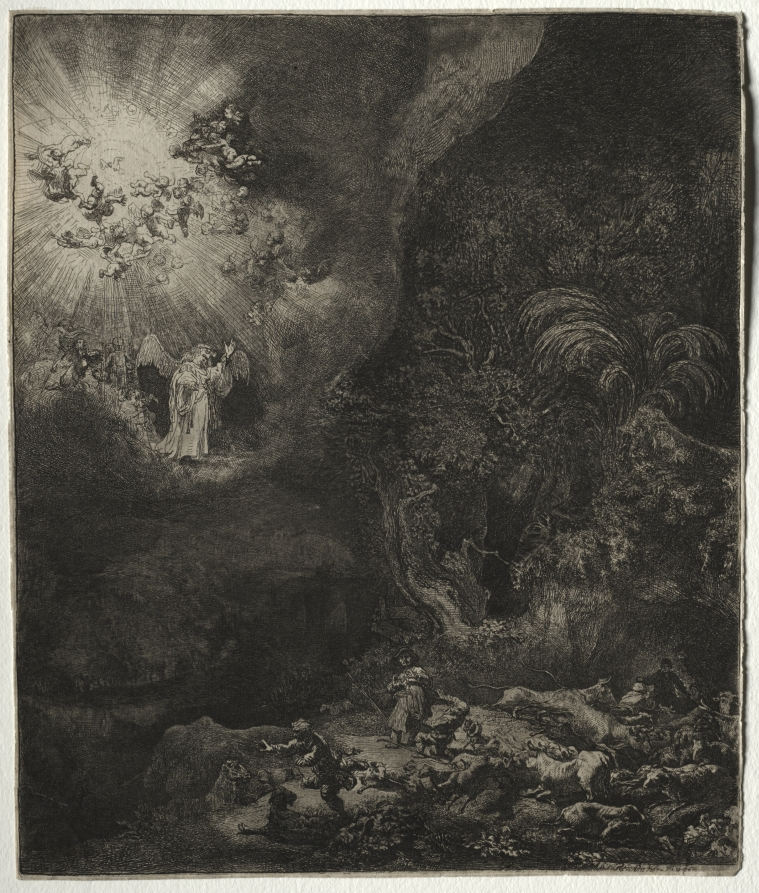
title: The Angel Appearing to the Shepherds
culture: Netherlands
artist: Rembrandt van Rijn (Dutch, 1606–1669)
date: 1634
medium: etching, with drypoint, engraving and sulfur tint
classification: Print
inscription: lower right, in plate: Rembrandt. f 1634 ; VERSO, lower left, in graphite: [J.S.O.?] ; lower center, in pen and brown ink: [illegible, inscription crossed out with pen and darker brown ink] ; lower right, in graphite: NPW[crossed out] ; lower right, in graphite: 507 ; lower right, in graphite: 33